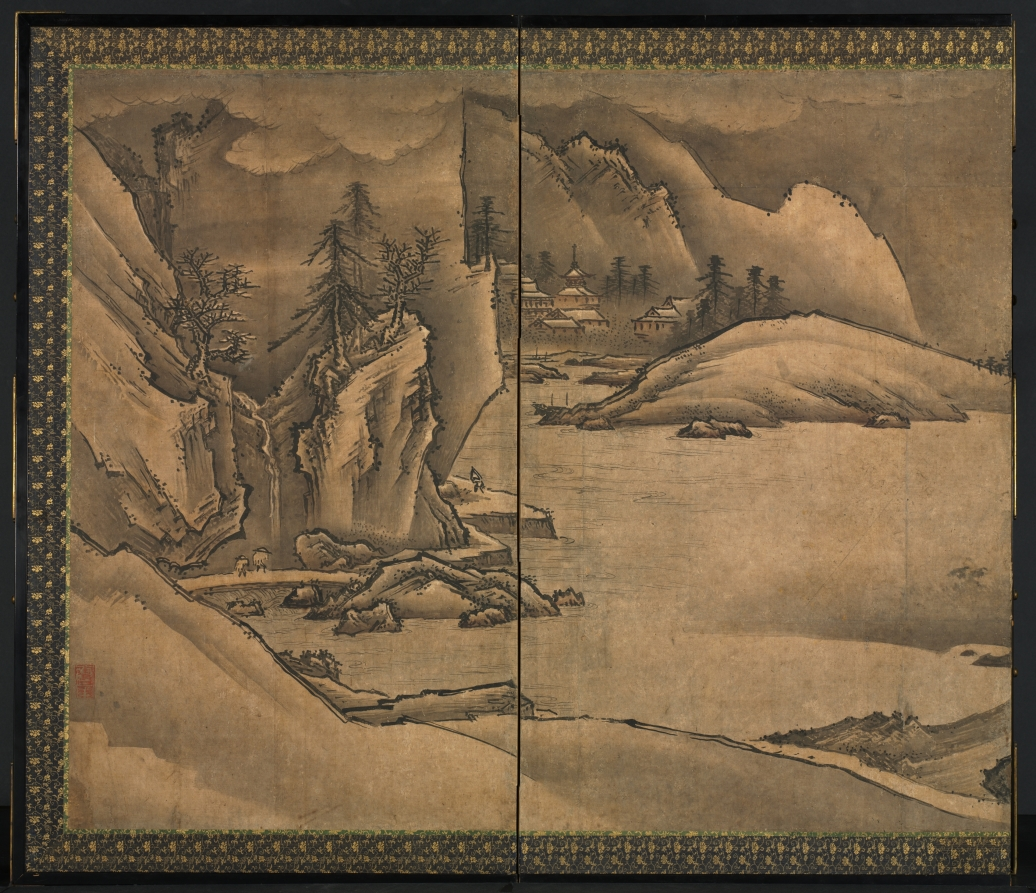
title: Landscape of the Four Seasons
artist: Yi Sumun (Korean, b. c. 1404)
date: late 1400s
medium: One of a pair of six-panel screens; ink and slight color on paper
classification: Painting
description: Yi Sumun is believed to have been a Korean painter who migrated to Japan in 1424 at the age of 20. This pair of screens is the artist’s most important composition in this format. Viewed from right to left, the screens show the passage of the four seasons, a popular theme in medieval Japanese ink painting.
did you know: Yi Sumun is believed to have been a Korean man who moved to Japan at the age of 20 and became an influential landscape painter in Japan.